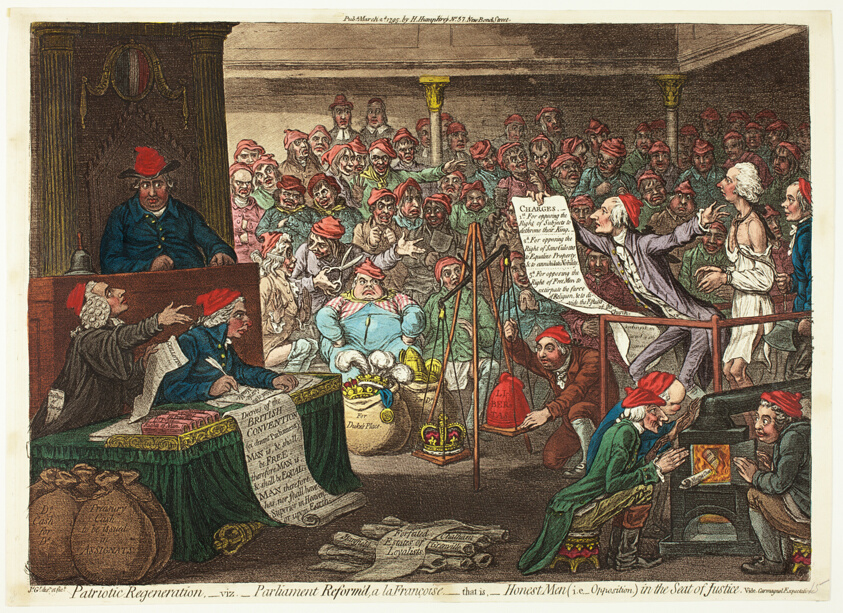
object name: Print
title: Patriotic Regeneration, -viz. - Parliament Reform'd, a la Françoise...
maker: James Gillray (English, 1756-1815); published by Hannah Humphrey (English, c. 1745-1818)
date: published March 2, 1795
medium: Hand-colored etching and aquatint on paper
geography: England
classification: etching; print; prints and drawing